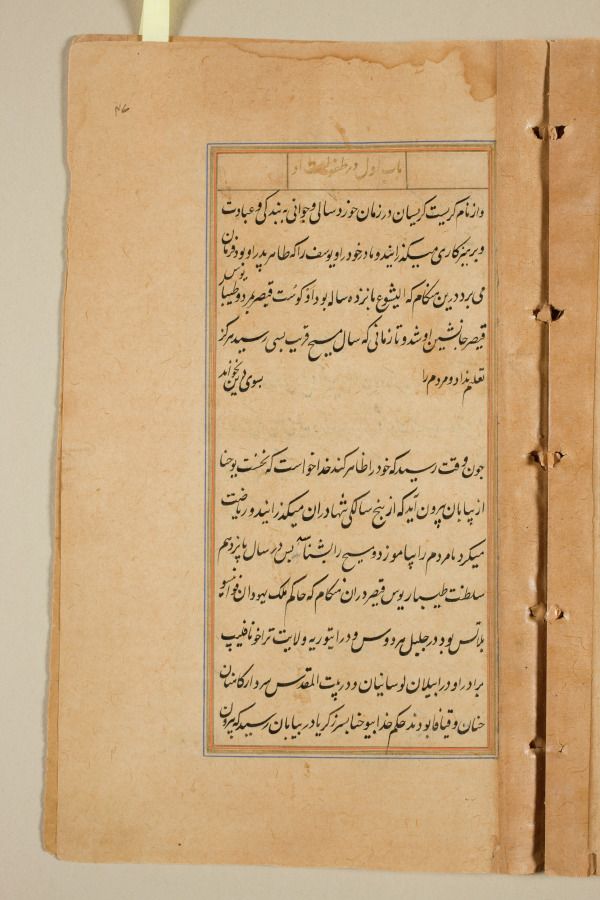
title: Text page from a Mirror of Holiness (Mir’at al-quds) of Father Jerome Xavier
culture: Mughal India, Allahabad, made for Prince Salim (1569–1627)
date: 1602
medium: Ink and gold on paper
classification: Manuscript